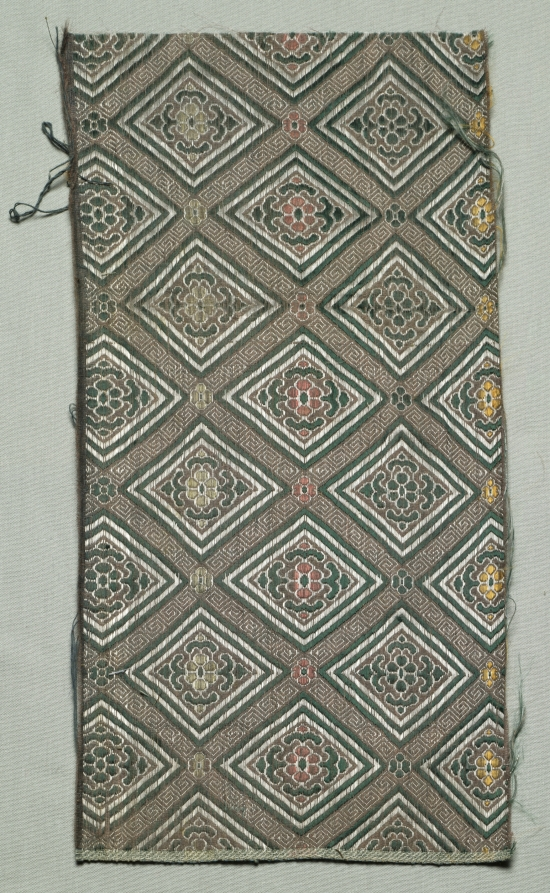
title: Textile Fragment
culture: Japan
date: 1800s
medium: silk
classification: Textile